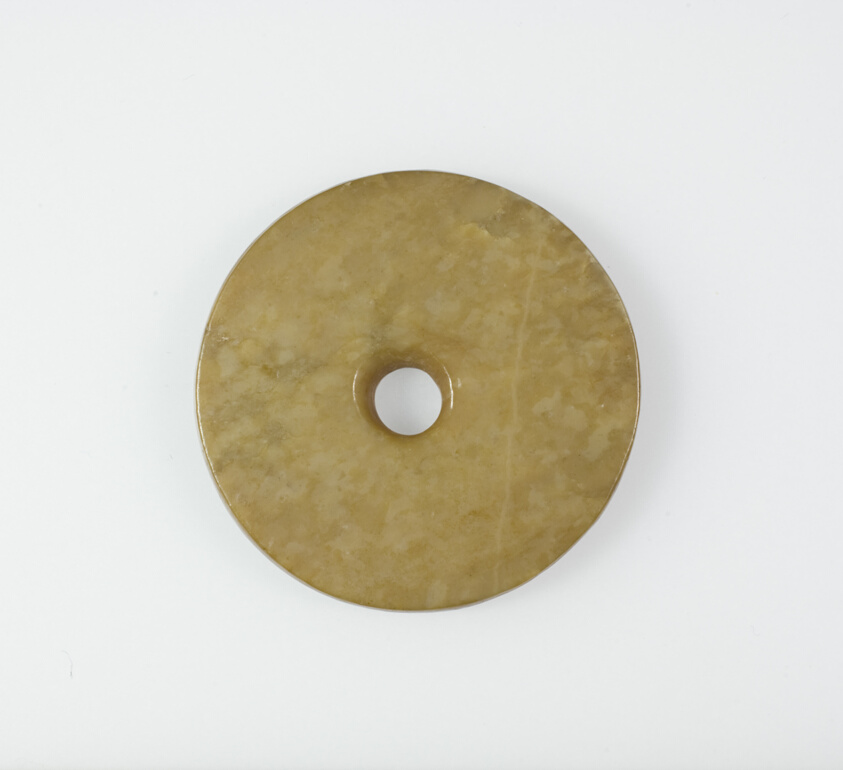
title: Disc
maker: China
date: Shang dynasty (c.1600–1050 BC)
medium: Jade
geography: China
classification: jade; asian art